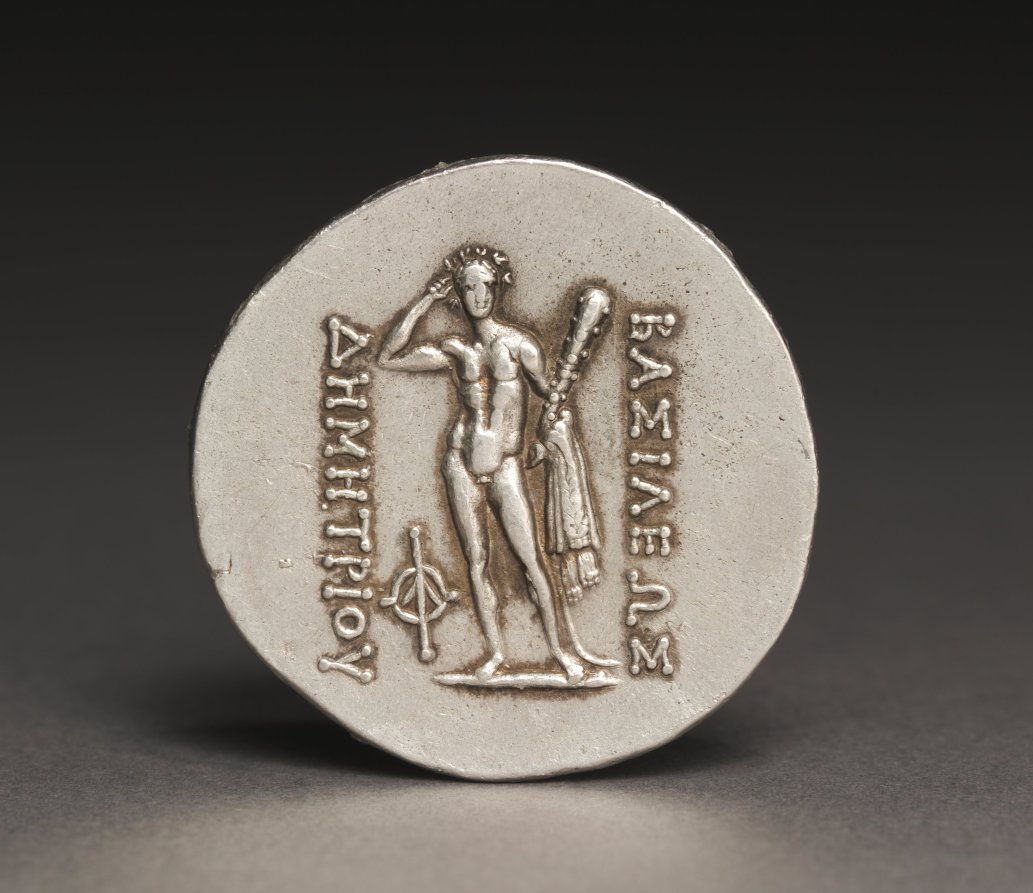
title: Coin of Demetrios, I (reverse)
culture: Afghanistan, Greco-Bactria, Demetrios I (c. 200–180 BCE)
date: 200–190 BCE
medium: silver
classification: Coins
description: Demetrios I (222–180 BC) ruled the Indo-Greek kingdom of Bactria from 200 to 180 BC and minted this coin to commemorate his conquests over territories to the south, in present-day Pakistan. He linked his image on his coin to Alexander of Macedon (356–323 BC), who depicted himself with a lion scalp after his conquest of India; Demetrios substituted an elephant for the lion. On the reverse is Hercules, also identified with Alexander.